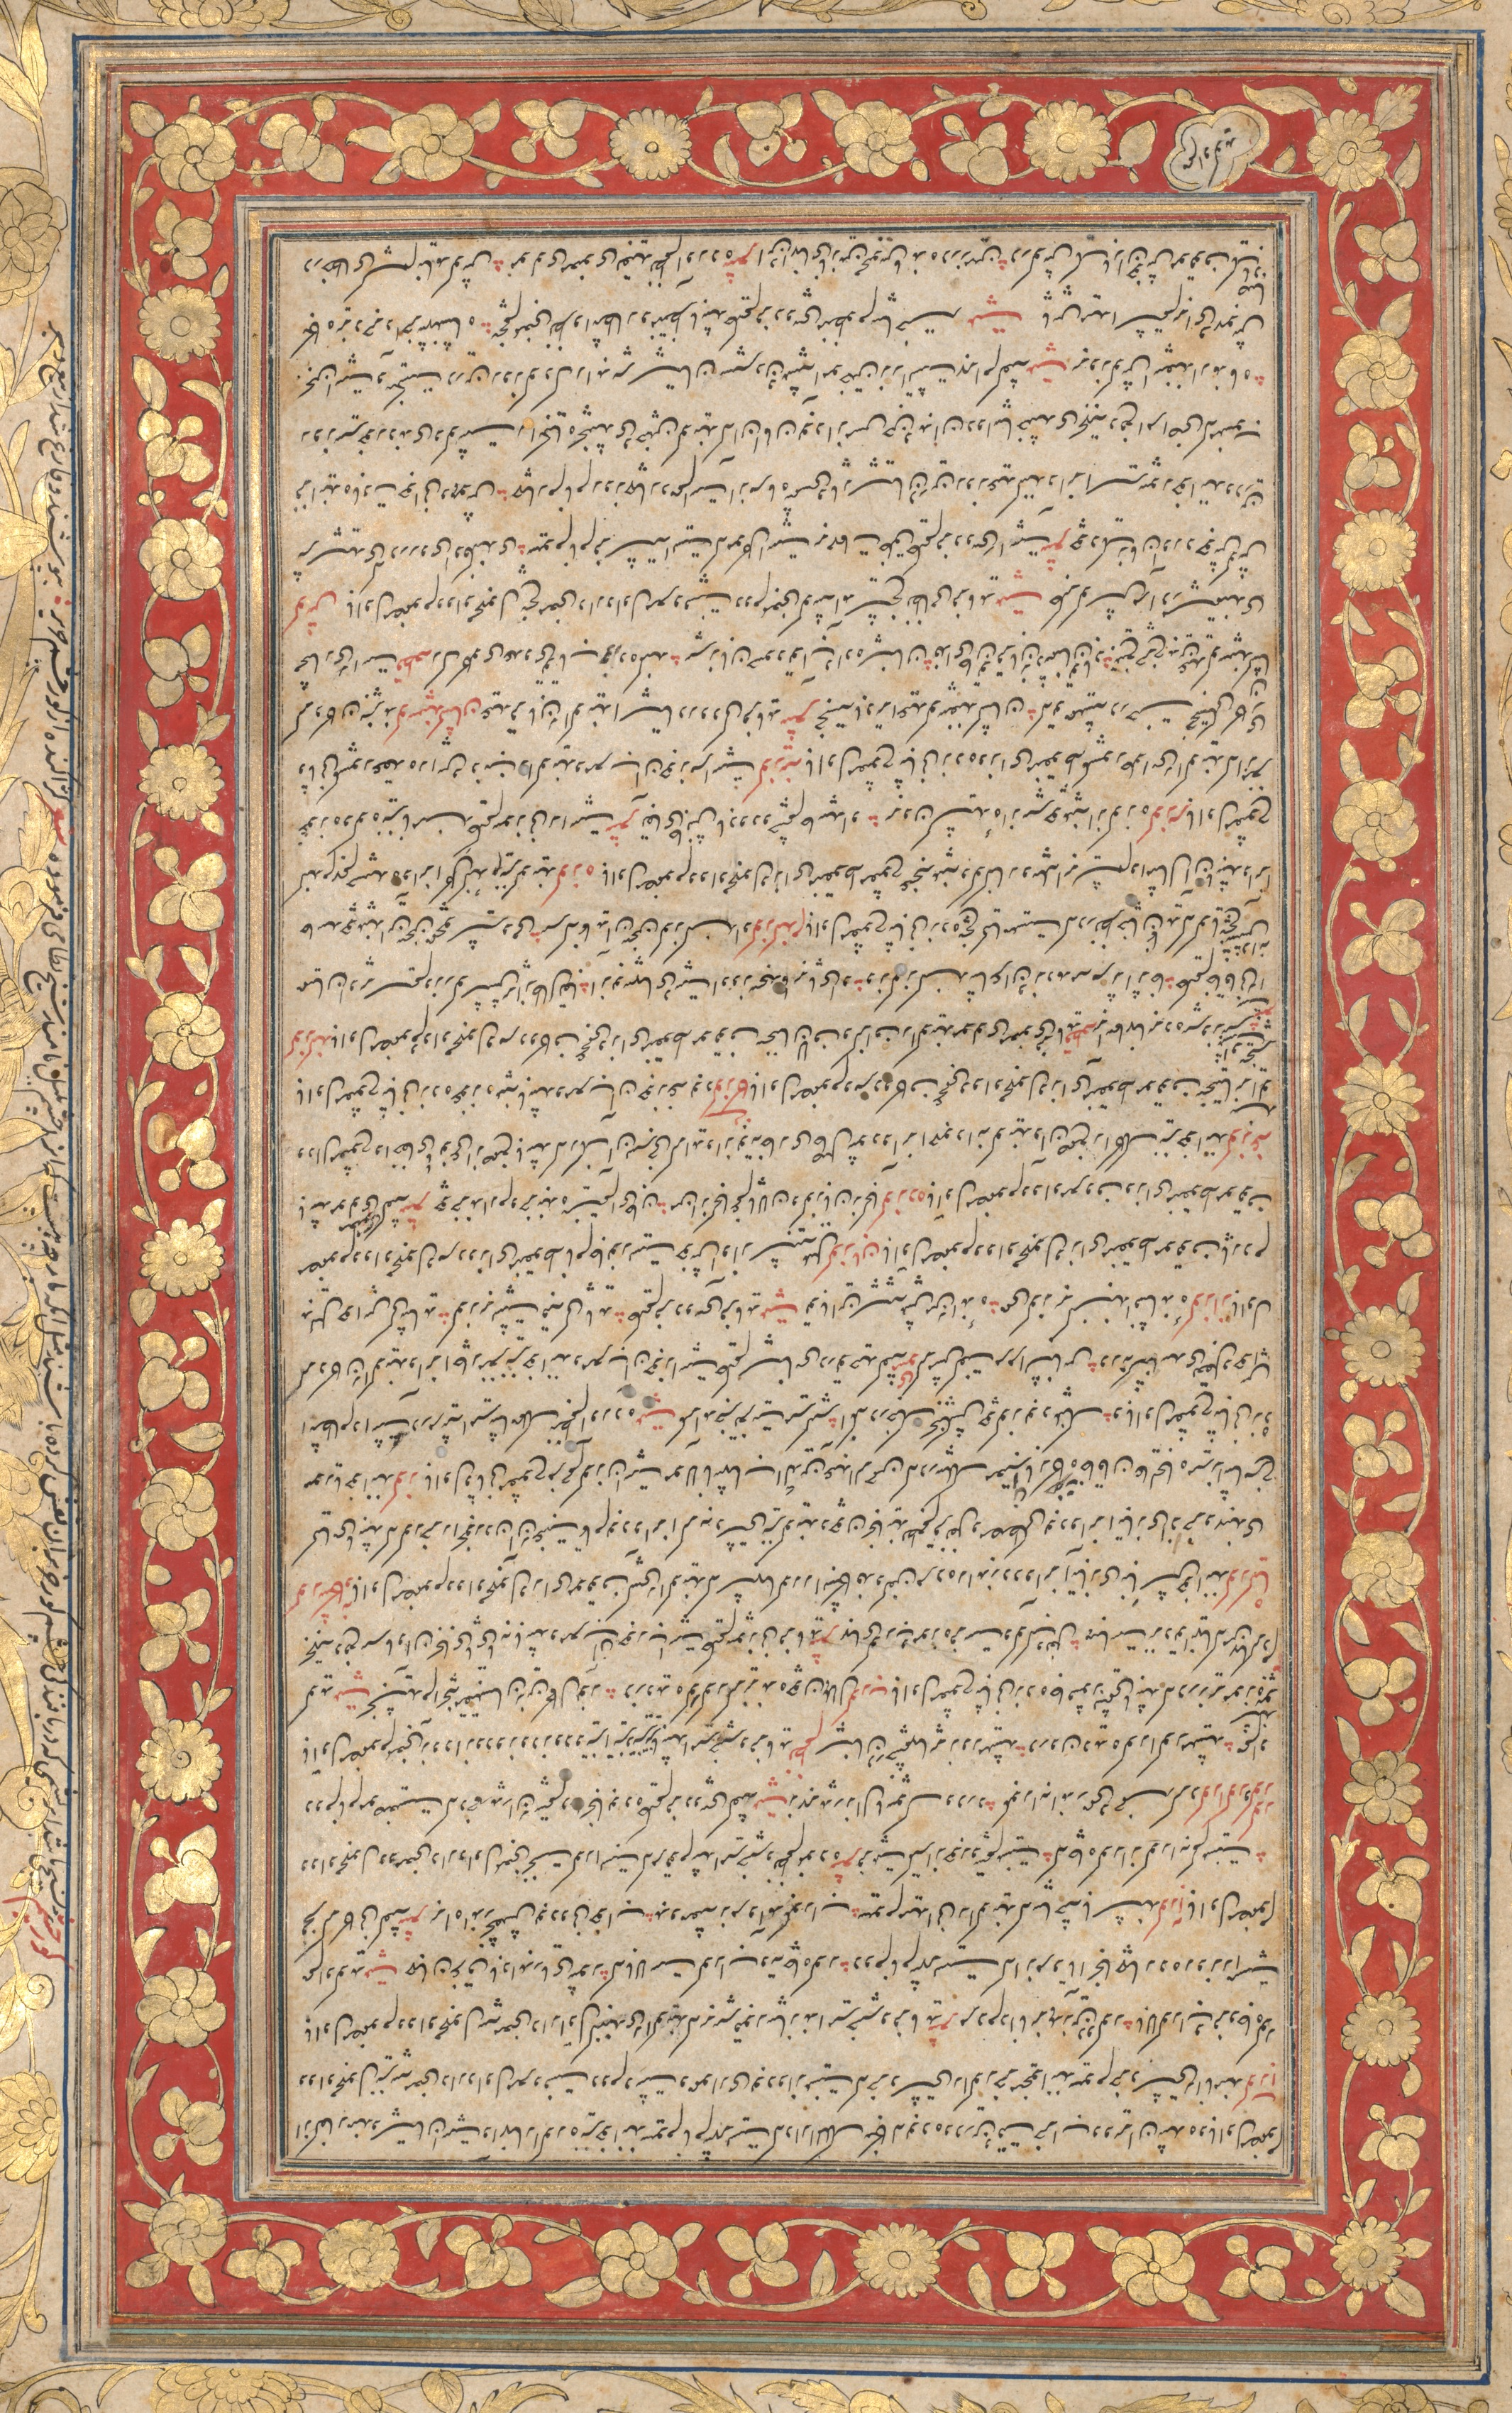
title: An Illuminated Folio from the Royal Manuscript of the Farhang-i Jahangiri (verso)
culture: Mughal India, court of Jahangir (1605–1627)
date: 1607–8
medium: Gum tempera, ink, and gold on paper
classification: Painting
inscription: Verso: “Gur” (name of a people in India) to “Gush” (morning east breeze, zephyr)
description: Farhang-i Jahāngīrī, one of the most complete and authoritative dictionaries of the Persian language, was compiled by Mir Jamal al-Din Husayn Inju. It took him 12 years to compile over 9,000 words with definitions and examples from verses by Persian poets. He was born in Shiraz, Iran, but lived most of his life in Agra, India, so the dictionary was named honor of the Mughal emperor Jahangir, who reigned from 1605 to 1627.